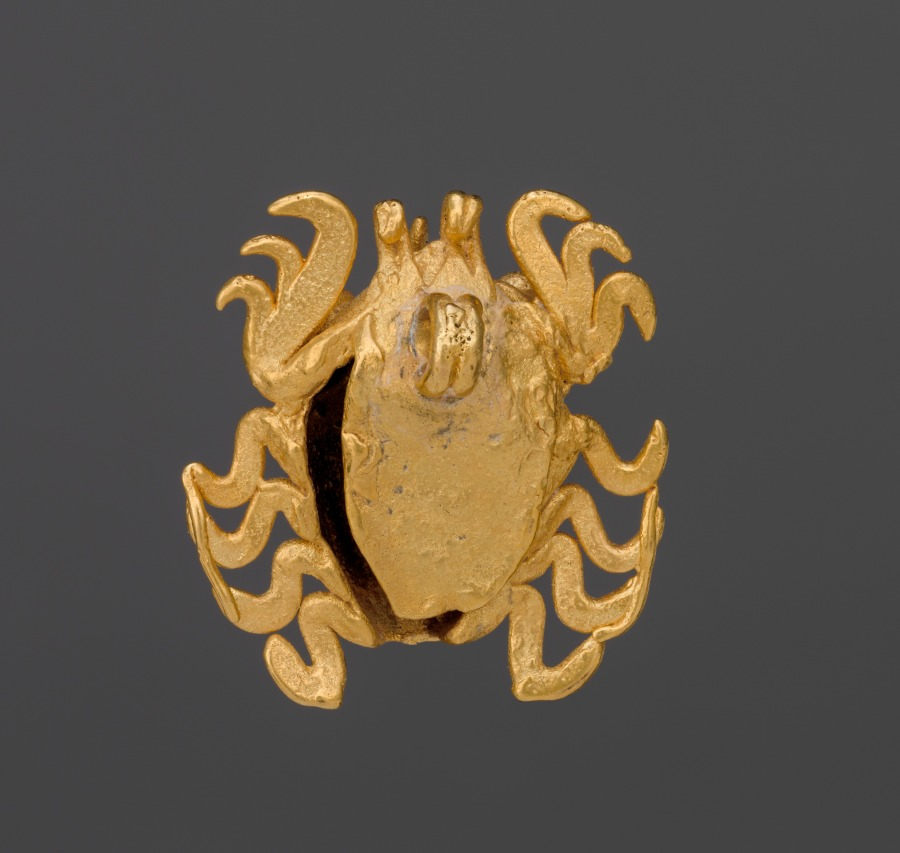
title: Insect Bell Pendant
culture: Isthmian Region (Panama), Coclé, 5th century-12th century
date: 400–1100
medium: gold, cast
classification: Metalwork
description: The identity of the creature depicted in this exquisite small pendant is unclear; it may combine features from the marine and insect worlds. A pellet inside the creature's body rattles when the pendant moves.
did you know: The practice of crafting gold objects in Panama dates back nearly 2,000 years.